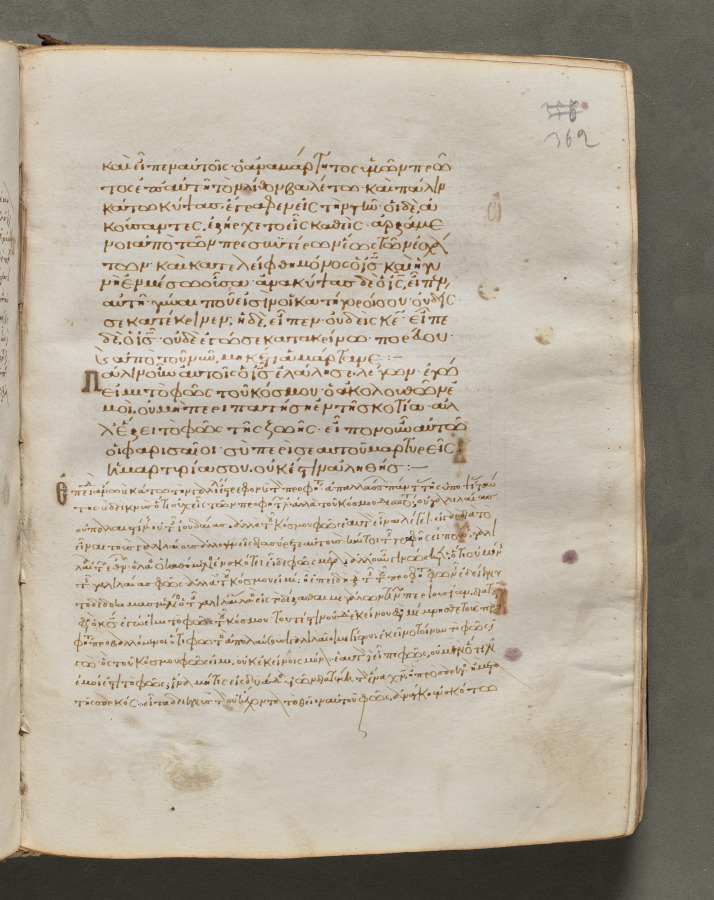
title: Text, folio 362 (recto), from a Gospel Book with Commentaries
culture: Byzantium, Constantinople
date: c. 1000–1100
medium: ink, tempera, and gold on vellum; leather binding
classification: Bound Volume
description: Each of the four gospels in this book opens on a page with brilliantly illuminated borders depicting the author of the text as well as birds—principally peacocks, symbols of the immortality of the soul—and fountains, representing the fountain of life and the salvation of the soul. This volume consists of 428 leaves with texts in Greek. Its level of sophistication suggests that it was probably written and decorated in a monastery in Constantinople.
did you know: Gospel books were carried in procession through Byzantine churches.